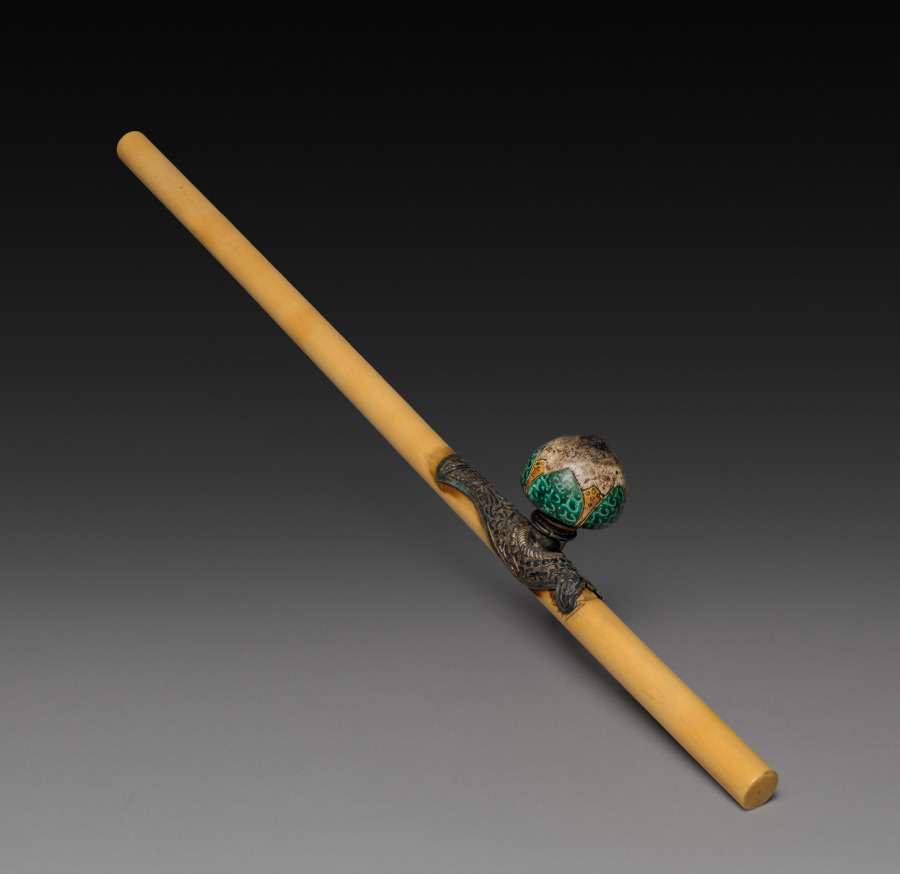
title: Opium Pipe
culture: China, Qing dynasty (1644-1911)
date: 1800s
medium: ivory stem decorated with raised design, metal repoussé work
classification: Miscellaneous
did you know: The porcelain bowl is covered with green and orange glazes.